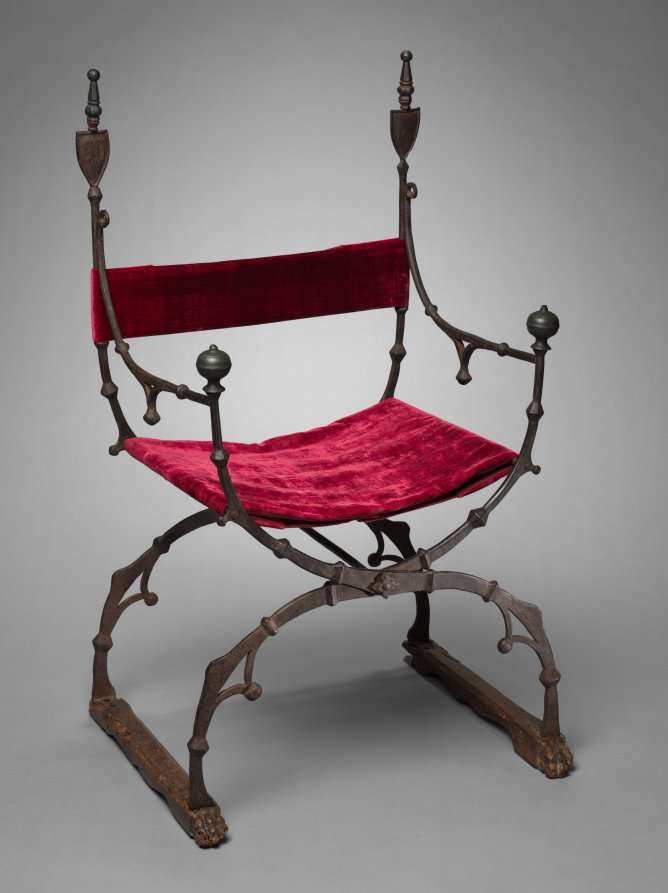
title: Curule (Folding) Chair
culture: Italy, Florence?, 15th century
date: c. 1450–1500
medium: forged iron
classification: Furniture and woodwork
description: This is a rare example of a Renaissance folding chair. It was intended to be lightweight and easily portable so that it could be folded and transported from room to room or even house to house. They were likely used in Italian homes, though they may have also been favored by scholars and clerics for use in their studies. Their portability also made them useful for extended travel. The fabric is a modern replacement.